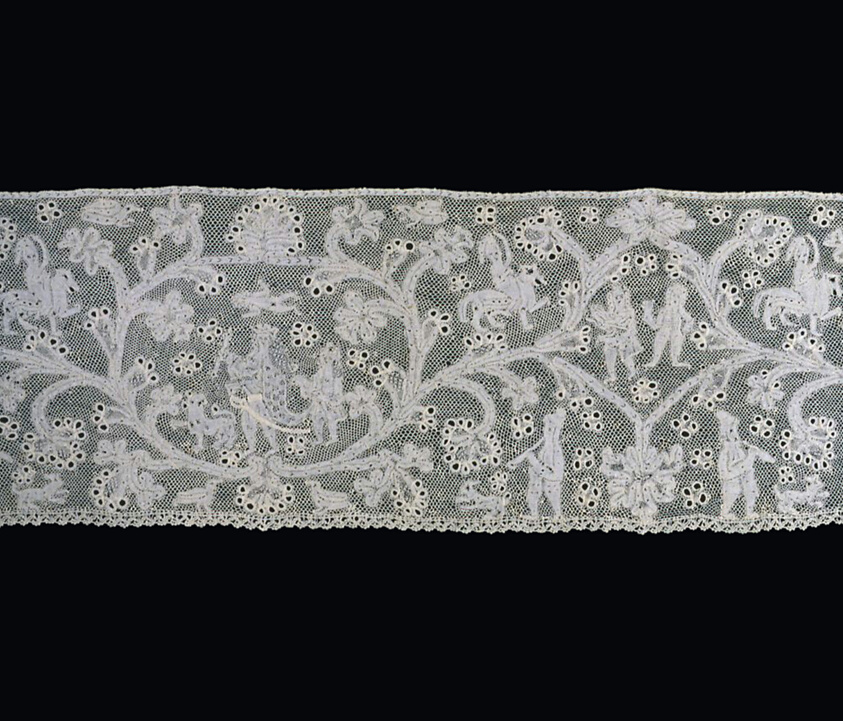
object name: Textile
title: Border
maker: Hungary (Slovakia)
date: 1725/50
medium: Linen, bobbin part lace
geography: Hungary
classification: textile; lace - bobbin